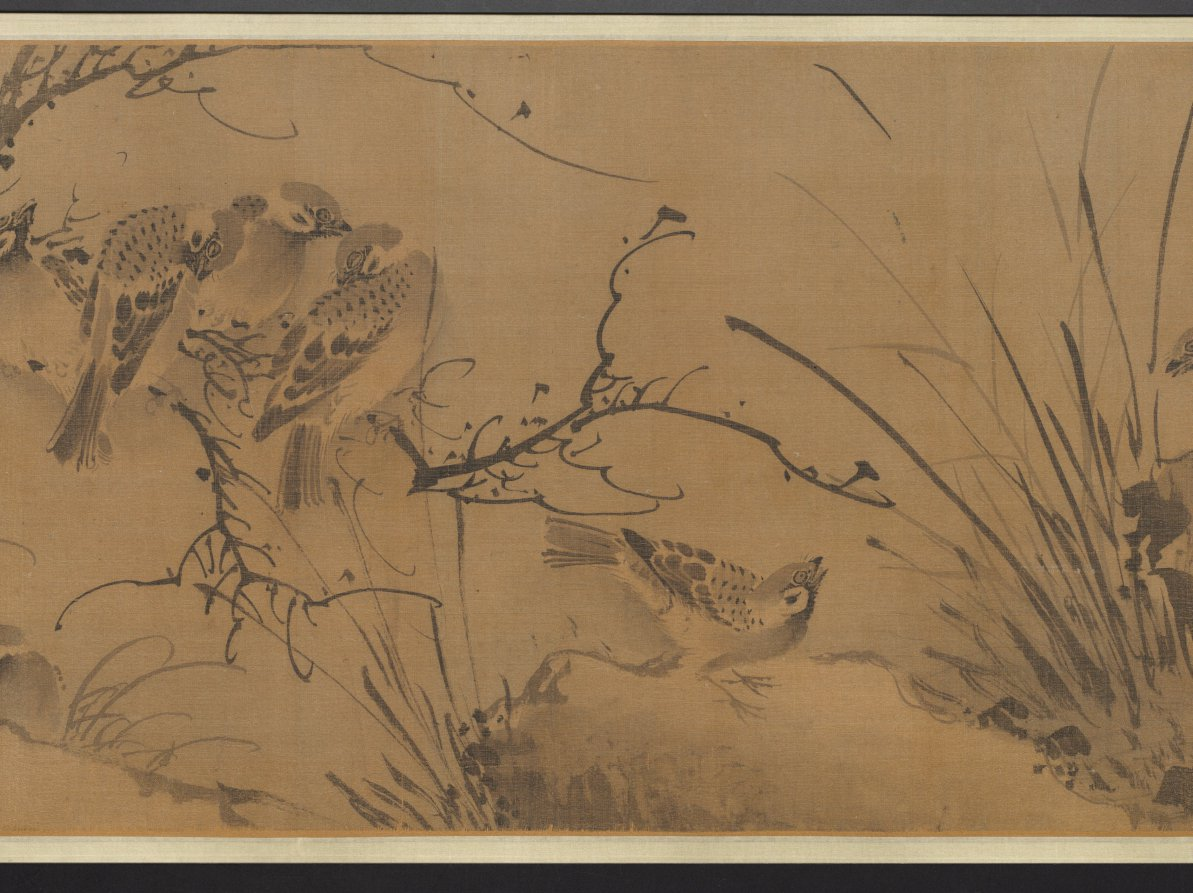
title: A Hundred Sparrows in a Lofty Grove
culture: China, Ming dynasty (1368–1644)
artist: attributed to Lin Liang (Chinese, 1416–1480)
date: 1368–1644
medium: handscroll; ink on silk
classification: Painting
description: Sparrows engaged in all kinds of activities frolic amid leafy branches, blades of grass, rocks, and a waterfall. As our eyes move over the scroll, the artist engages us in enjoying the sparrows’ carefree movements in a natural setting. The charming birds were painted from close observation in swift and fluent brushstrokes. Sparrows are a common bird and in Chinese painting they often represent the commoner in human society as opposed to the noble pheasant or peacock representative of the ruling class.